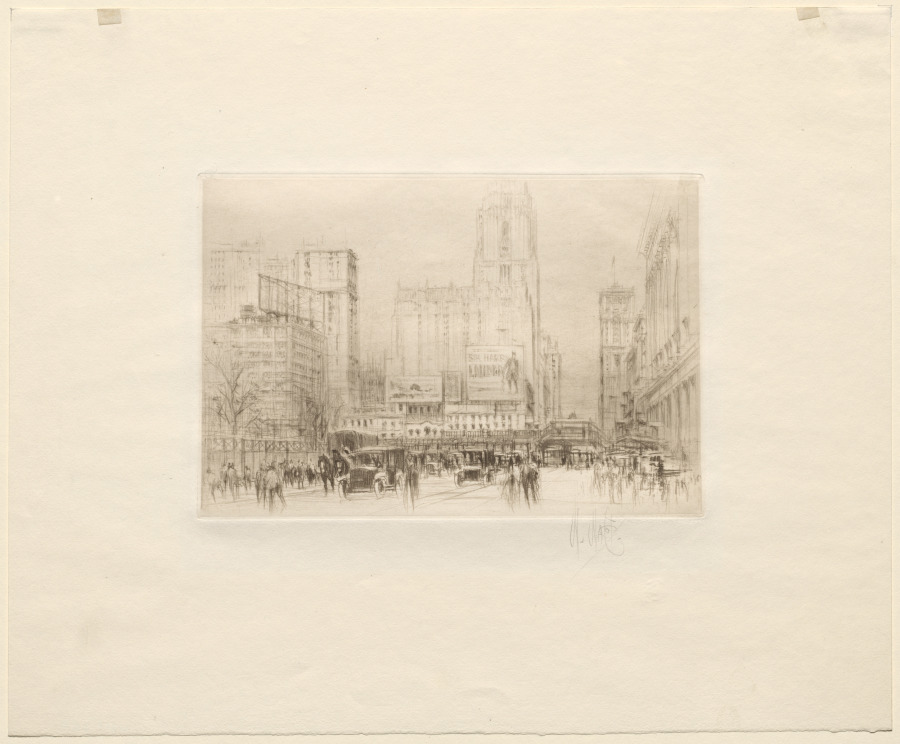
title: Forty-second Street NY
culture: England, 20th century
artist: William Walcot (British, 1874–1943)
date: 1923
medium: etching in brown and aquatint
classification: Print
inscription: Lower right, in graphite: W. Walcott